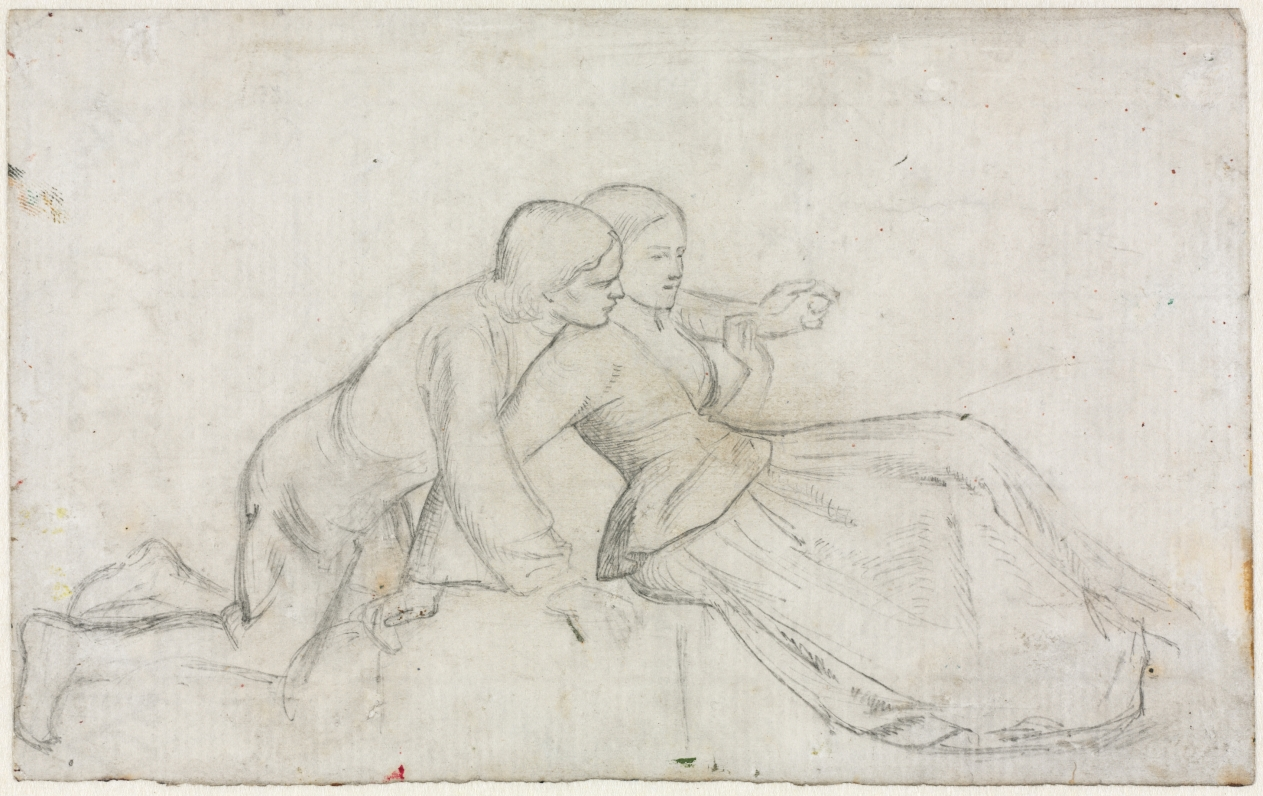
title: Study for "The Hireling Shepherd"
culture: England, 19th century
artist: William Holman Hunt (British, 1827–1910)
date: 1851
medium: graphite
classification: Drawing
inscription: inscribed, in graphite, on verso, at lower edge: Sketch for figures in Hireling Shepherd; in graphite, on verso, at center of sheet: First Drawing Hireling Shepherd Pale Cream Mt o Linen same as Scapegoat o Frame same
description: Together with Dante Gabriel Rossetti and John Everett Millais, William Holman Hunt was one of the founding members in 1848 of the Pre-Raphaelite Brotherhood, a group of young artists who rejected the heavy darkness and idealization of academic history painting, replacing it with meticulously observed, jewel-colored naturalistic detail. This is a study for the figures in the oil painting The Hireling Shepherd, Hunt’s first commercial success. The poses of the couple in the painting are remarkably close to the early study: the shepherd approaches the shepherdess upon his knees, encircling her shoulders with his arm. Devoid of extraneous detail, the study concentrates on the romantic play and erotic tension expressed by the lovers’ intertwined limbs and faces and hands that stop just short of touching.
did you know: Contemporary viewers would have recognized the painting for which this drawing is a study as bearing a deeper meaning: the couple's risky flirtation will lead to disastrous consequences and the shepherd ignores his flock while distracted by romance.